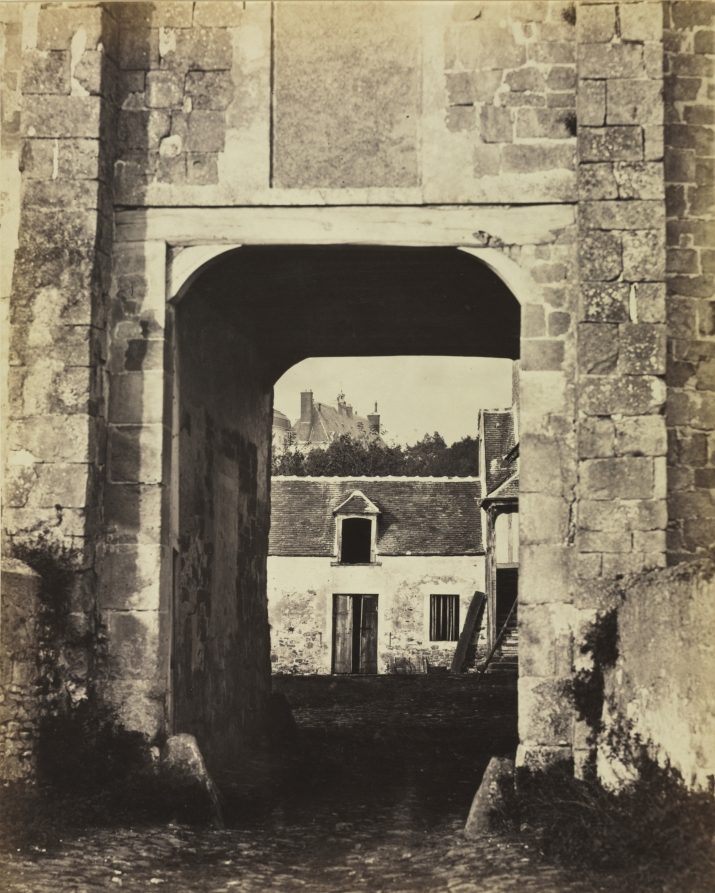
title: Rural Estate Seen Through Archway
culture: France, 19th century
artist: André Philippe Régnier (French, 1837–1913)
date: 1860s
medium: albumen print from wet collodion negative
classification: Photograph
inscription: written in pencil on recto: "78 / 8 [sideways] SK